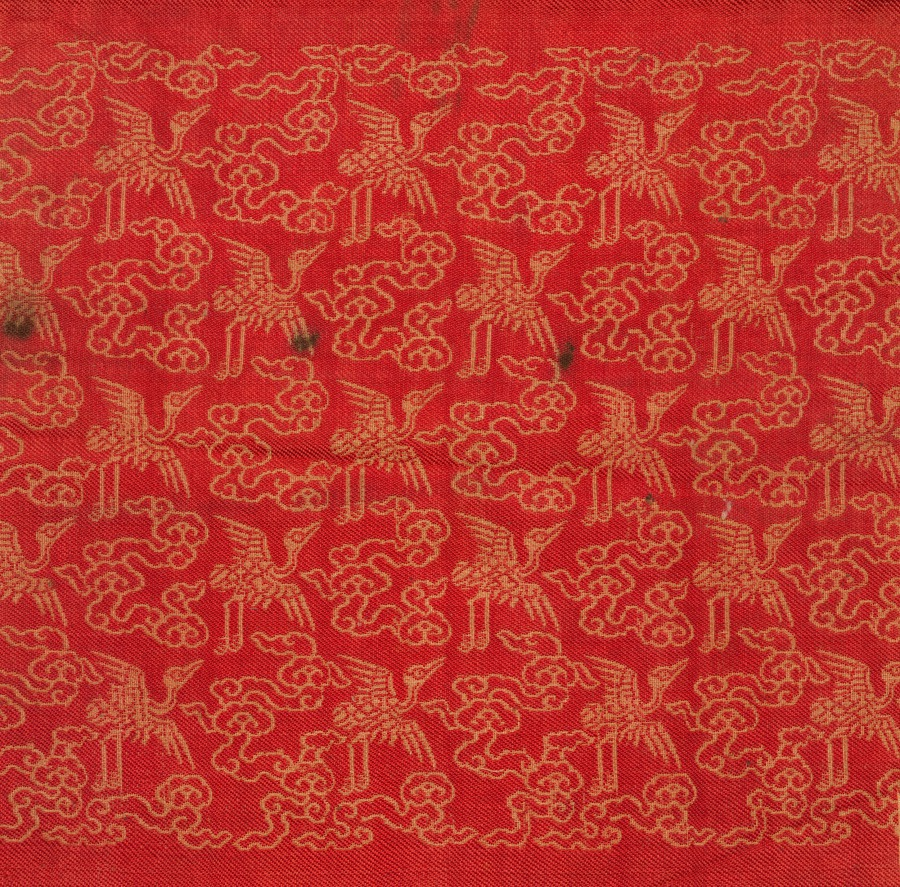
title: Fragment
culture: Japan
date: 1800s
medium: silk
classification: Textile